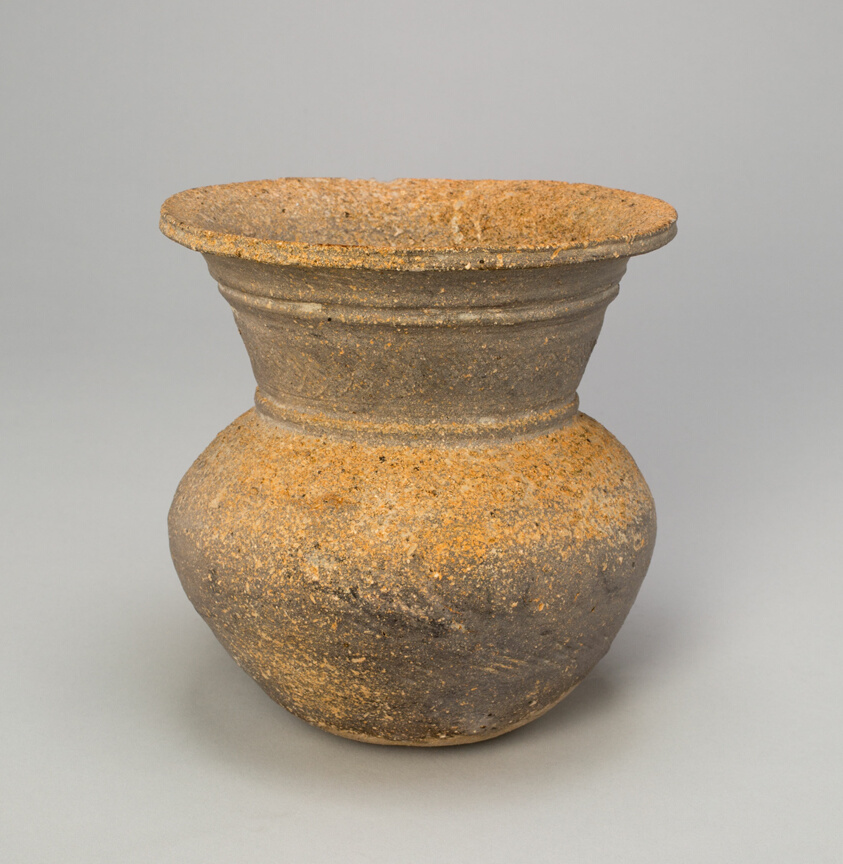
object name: Vessel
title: Globular Jar with Trumpet-Shaped Mouth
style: Korean (culture or style)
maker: Korea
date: Three Kingdoms period (57 B.C.–A.D. 676), Gaya Federation (42 BC–562 AD), 5th/6th century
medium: Stoneware with natural ash glaze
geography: Korea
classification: stoneware; ceramics; asian art; vessel